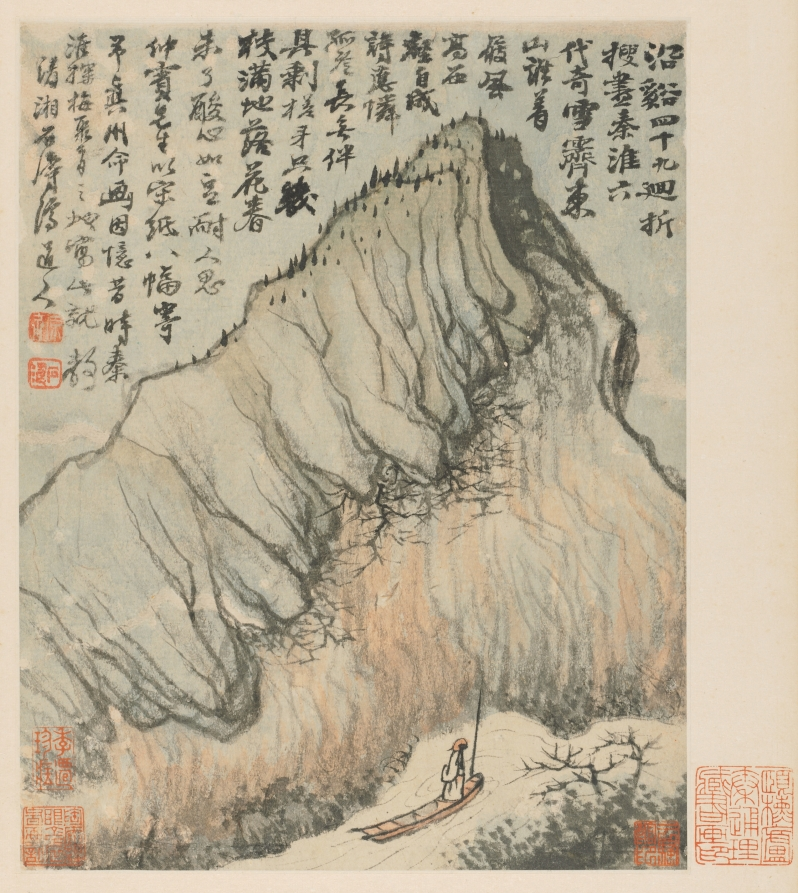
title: Reminiscences of Qinhuai River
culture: China, Qing dynasty (1644-1911)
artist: Shitao (Chinese, 1642–1707)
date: 1642–1707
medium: Album leaf; ink and color on Song paper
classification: Painting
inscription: 沿溪四十九迴折，搜盡秦淮六代奇。/ 雪霽東山誰着屐，風高西壑自成詩。/ 應憐孤冷長無伴，其剩槎牙只幾枝。/ 滿地落花春未了，酸心如豆耐人思。/ 仲賓先生以宋紙十幅寄余真州命畫。因憶昔時秦淮探梅聚首之地，寫此就教。清湘石濤濟道人。[印]原濟; 石濤.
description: This album leaf was probably created in 1695 for a friend Shitao had traveled with to visit ancient sites along the Qinhuai River from the Six Dynasties period. A tiny figure in a boat looks up in awe toward rising mountain masses that form an overhanging cliff, perhaps an image for the overwhelming history of Nanjing. Shitao was born two years before the Ming dynasty fell. A descendant of the first Ming emperor, he later lived in Nanjing, Yangzhou, and Anhui province. Despite his affiliation with the Ming imperial family, he met the Qing dynasty Kangxi emperor twice.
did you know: The figure in the boat scans the cliff seeking a glimpse of a final plum blossom of the season.